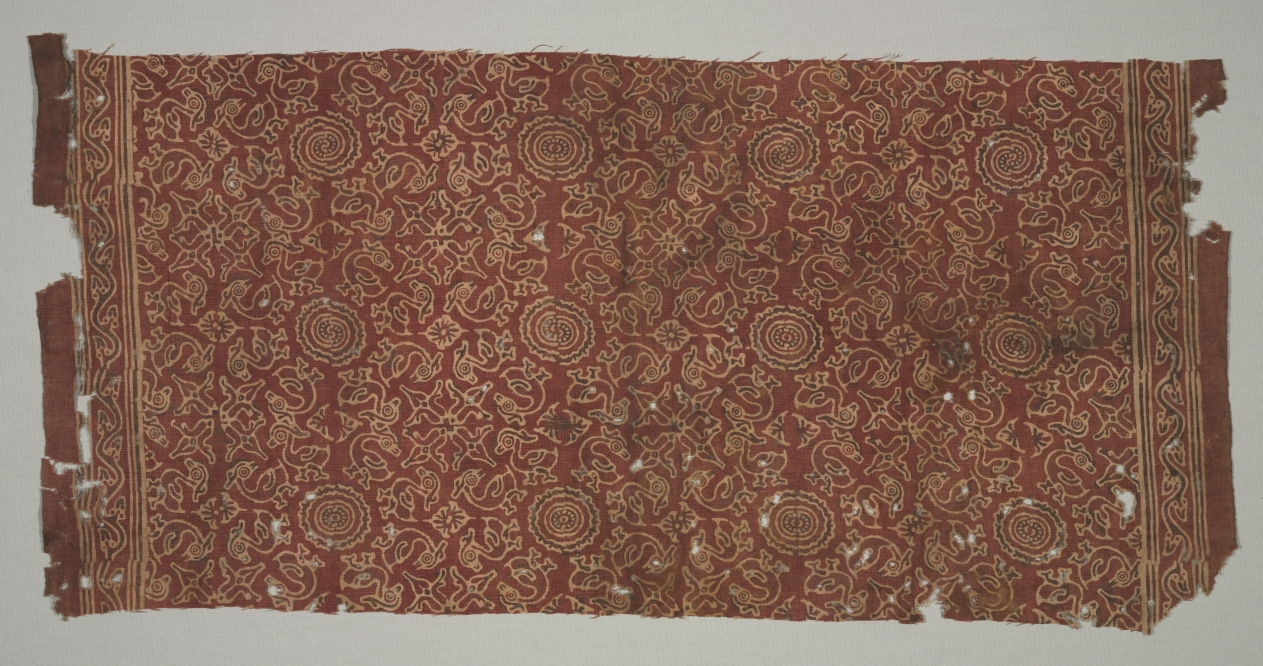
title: Fragment with geese circling lotus medallions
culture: India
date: 1400s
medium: plain weave: cotton, stamped mordant resist and dyed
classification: Textile